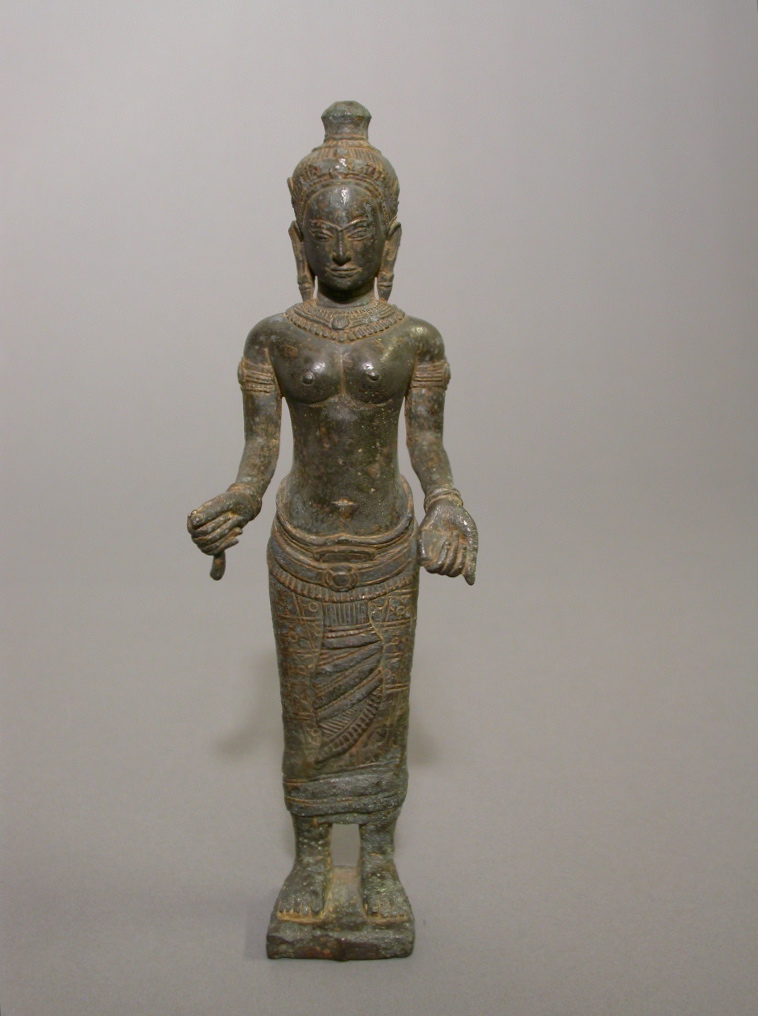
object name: Sculpture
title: Prajnaparamita, Goddess of Wisdom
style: Southeast Asian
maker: Cambodia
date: Angkor period, late 12th/early 13th century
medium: Bronze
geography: Cambodia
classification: bronze; metal; sculpture; asian art